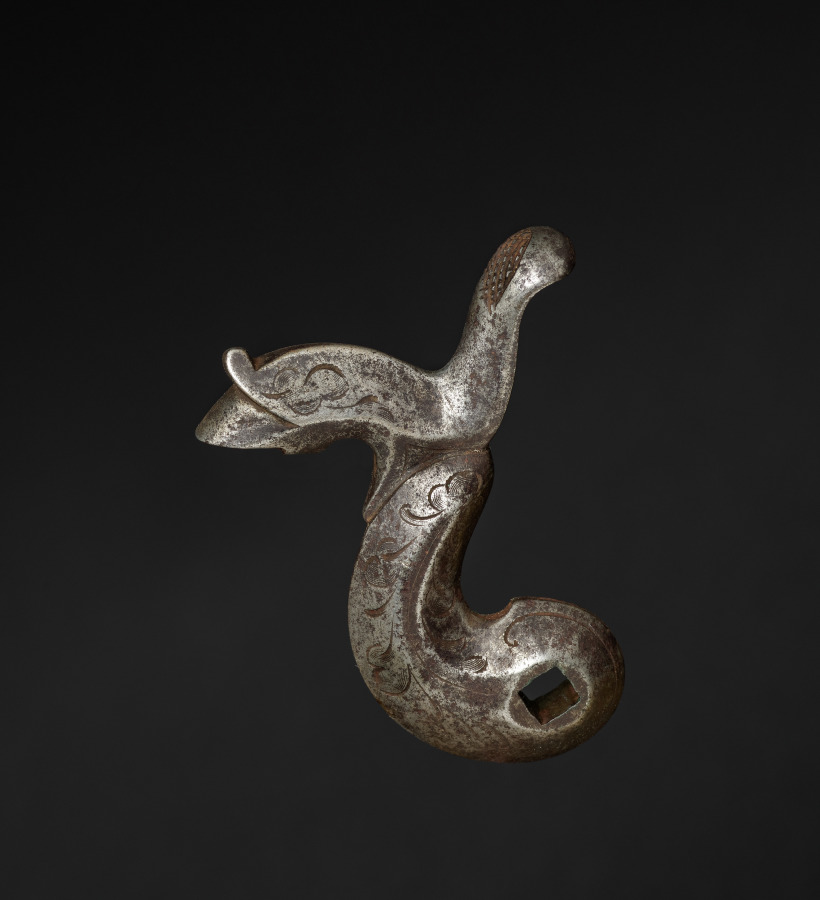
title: Gun-Lock Hammer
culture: England, early 19th century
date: c. 1800–1825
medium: steel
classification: Arms and Armor